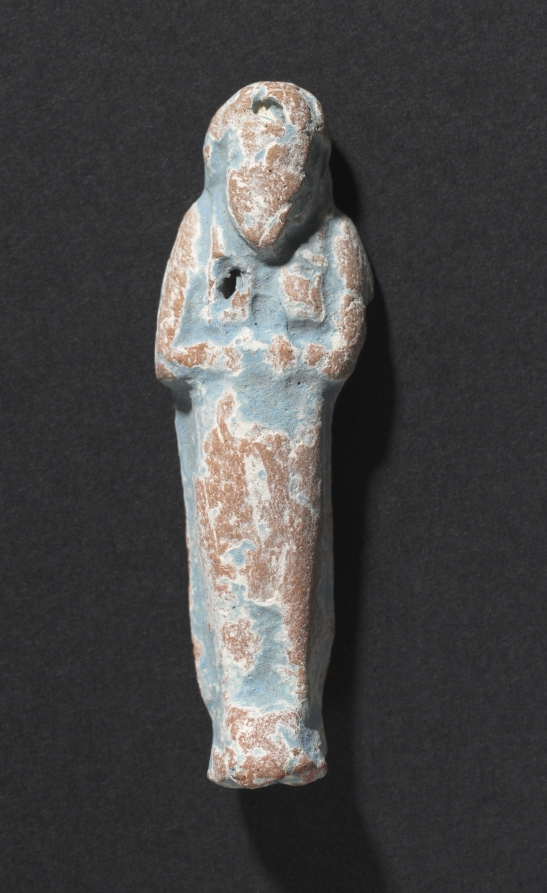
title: Shawabty of Ditamenpaankh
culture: Egypt, Late period (715–332 BCE), Dynasty 25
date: 715–656 BCE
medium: terracotta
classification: Funerary Equipment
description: High demand for shawabtys in the Late Period, a time when as many as 400 or more shawabtys were placed in the tomb with the deceased, gave rise to a specialized container for storing them: the shawabty box. This example is inscribed for the lady of the house, Ditamenpaankh, and was probably one of a pair originally made for her. The single-masted boat on the box's lid is perhaps an allusion to the pilgrimage of the deceased to the holy city of Abydos, the cult city of Osiris, king of the dead. The shawabtys inside are crude, mass-produced examples cast in an open mold. Made of terracotta, their blue paint imitates more costly shawabtys made of faience. As for the shawabty spell, it has been removed from its traditional location on the shawabty's front and relocated onto the sides of box, where it needed only to be written once, thus expediting production.